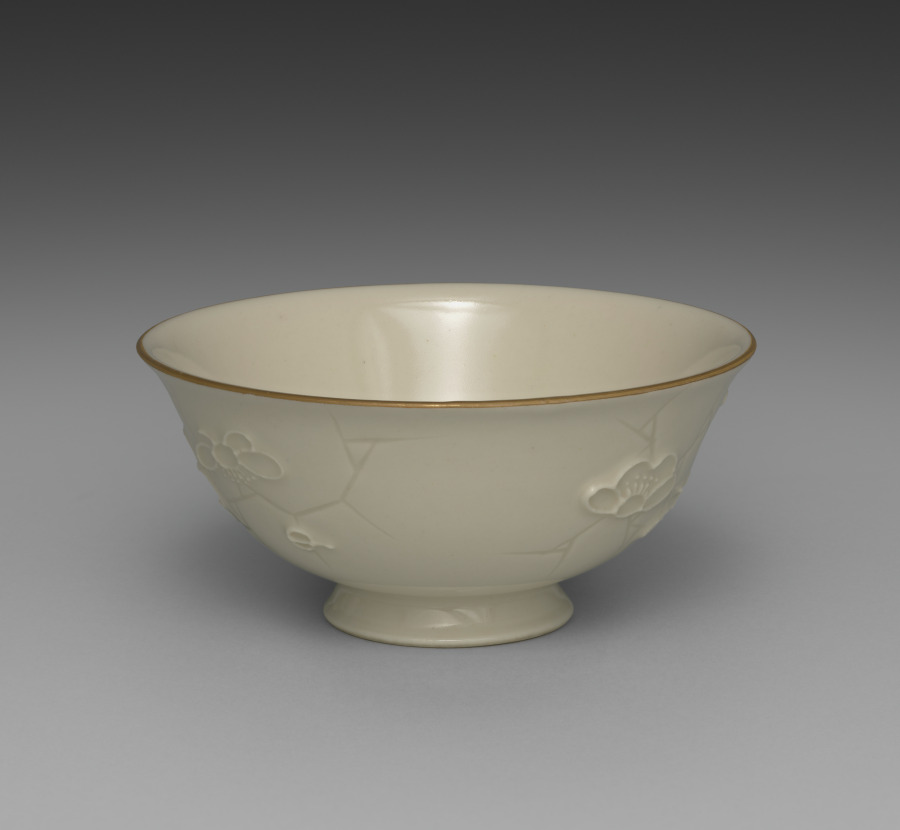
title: Bowl from Dining Set with Plum Blossoms and Cracked-Ice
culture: Japan, Meiji period (1868–1912)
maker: Seifū Yohei II (Japanese, 1844–1878)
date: c. 1875–78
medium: Porcelain with molded designs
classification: Ceramic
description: Each item in this set has a delicate low-relief design of flowering plum branches over scattered, intersecting lines meant to resemble the cracked-ice surface of a frozen body of water and is signed on the base in gold pigment. While Yohei II produced many fine works in underglaze blue, like those produced by Kiyomizu Shichibei, he also made works in quite different styles later in his career, from the early 1870 s. In 1873, he was appointed purveyor to the Industrial Center of Kyoto Prefecture, a designation associated with Kyoto’s efforts to reach an international market through the port of Kobe; and from 1875 until his death, he was involved in national-level projects to present Japanese ceramics across the world. It was during this period that Yohei III was apprenticed to Yohei II, and it has been suggested that this set may in fact be an early example of Yohei III’s work, which he signed with his teacher’s name. Decorated with flowers resembling Japanese textile motifs, the set calls to mind the design of Yohei II’s pair of vases with plum blossoms in the Victoria and Albert Museum. Here, the elaborate trees created for a formal public exhibition setting have been translated into the approachable blossoms of the genteel domestic environment. While the designs are consistent across the pieces, each raised flower petal and pistil and each incised line in the ice was done by hand, so the cups, bowls, and dishes are similar yet unique. The bottoms of two boxes once identified the set’s owner, but the information has been deliberately obscured with black ink. However, inscriptions still visible appear to indicate two occasions, once at the end of July 1886 , and once again in June 1916 , when parts of the set were requested from Hokura in Niigata Prefecture. The location corresponds to a neighborhood in the present-day city of Jōetsu. The surname Tsuji 辻 also appears on a paper tag affixed to one of the box cloths. Future research may possibly reveal more about their provenance. A vase by Yohei III in a private collection combines the formal grandeur of the Yohei II vases in the Victoria and Albert Museum with the gentler design of this dining set, placing flowering plum trees against soft, scalloped-edge clouds resembling those in golden screens.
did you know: The dining wares have a creamy white coloration that the four boxes containing them identify as Korean in style.